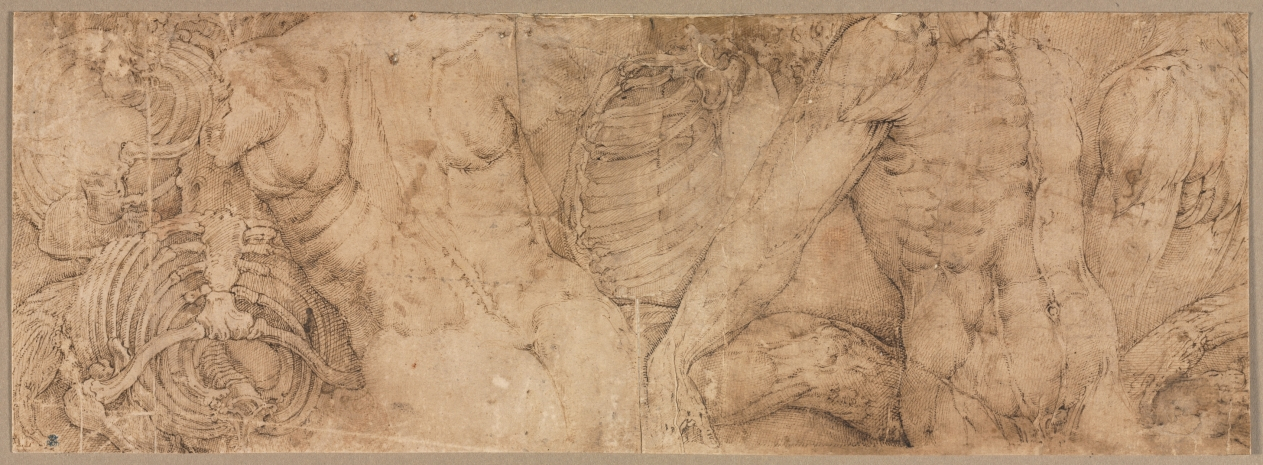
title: Torsos with Rib Cages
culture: Italy, 16th century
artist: Battista Franco (Italian, c. 1510–1561)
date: early 1540s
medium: pen and brown ink with incised lines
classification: Drawing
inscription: VERSO OF SECONDARY SUPPORT, lower left, in graphite: 1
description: Michelangelo was among the first artists in Europe to attend a human dissection and to adopt anatomical knowledge as a necessity for depicting the human figure. These drawings by Battista Franco reflect the increased—and slightly macabre—interest in the interior workings of the human body inspired in part by Michelangelo’s example. Here, the groupings of rib cages, though rendered accurately, are placed into decorative piles. The odd assembly vacillates between scientific study and a symbolic memento mori, or reminder of death.